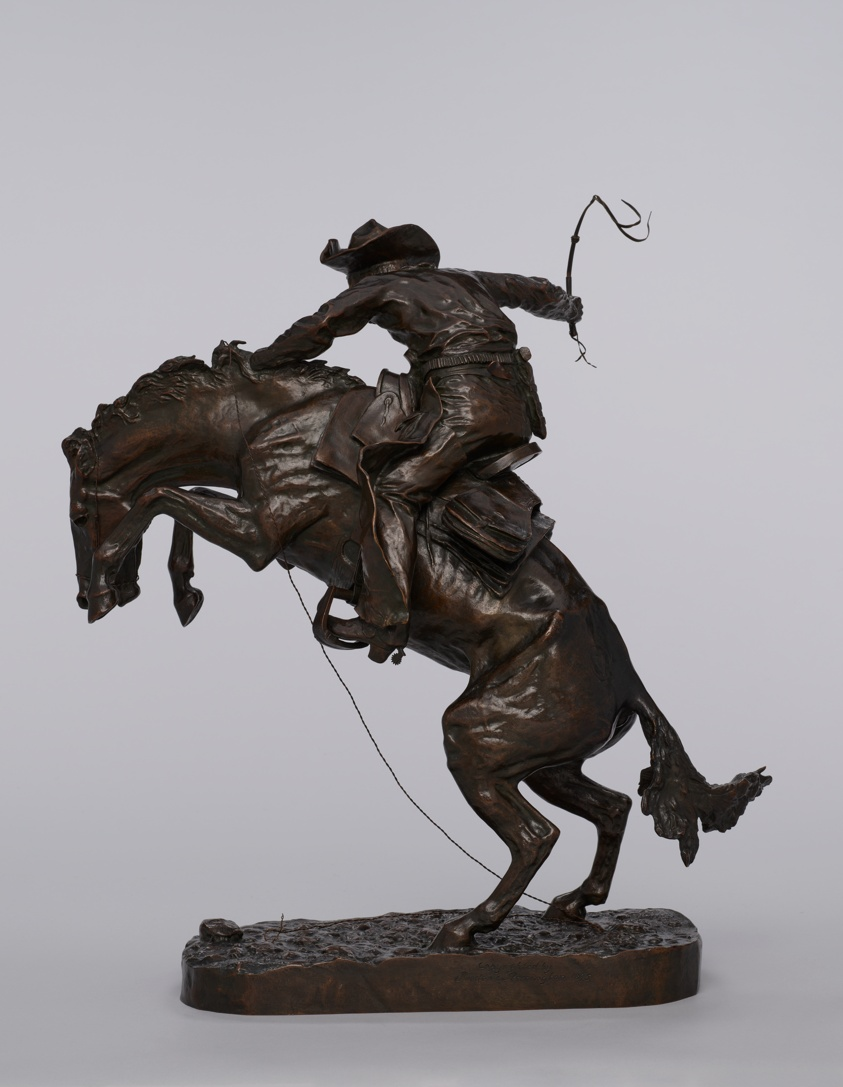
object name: Sculpture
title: The Bronco Buster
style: 19th century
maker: Frederic Remington (American, 1861–1909); Cast by Henry-Bonnard Bronze Co. (American, 19th century)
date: Modeled 1895, cast 1899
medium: Bronze with brown patina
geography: United States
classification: sculpture; american arts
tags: animals, rodeos, cowboys, horses, horseback riding, people, portraits